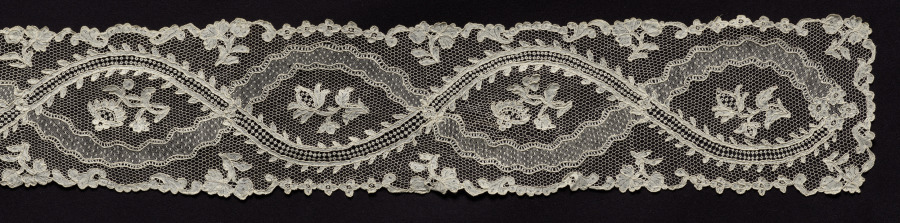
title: Lace Lappet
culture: France, Argentan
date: 1715–74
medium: Linen: needle lace (Point de Argentan)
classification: Lace